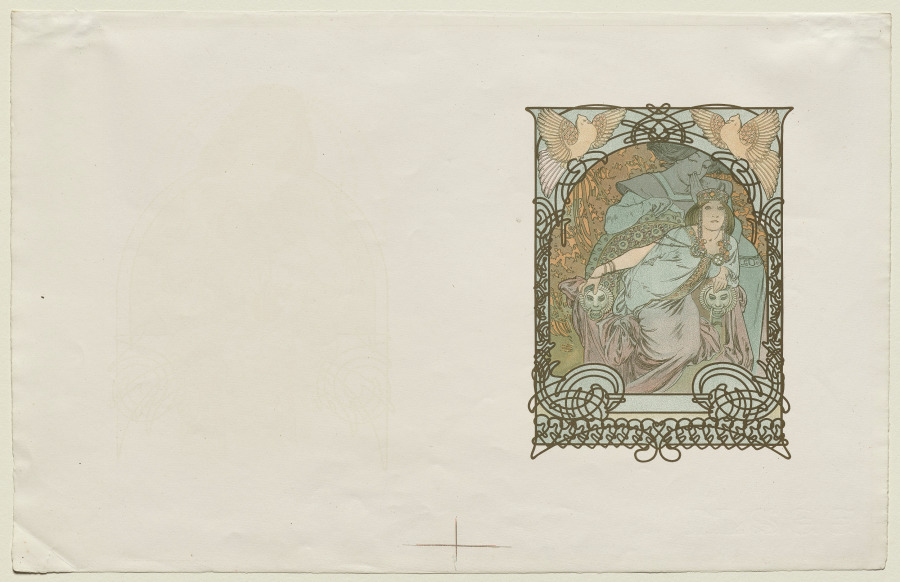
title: Ilsee, Princesse de Tripoli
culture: Czechoslovakia, 19th century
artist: Alphonse Mucha (Czech, 1860–1939)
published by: by Robert de Lfers, published by H. Piazza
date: 1897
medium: color lithograph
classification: Print